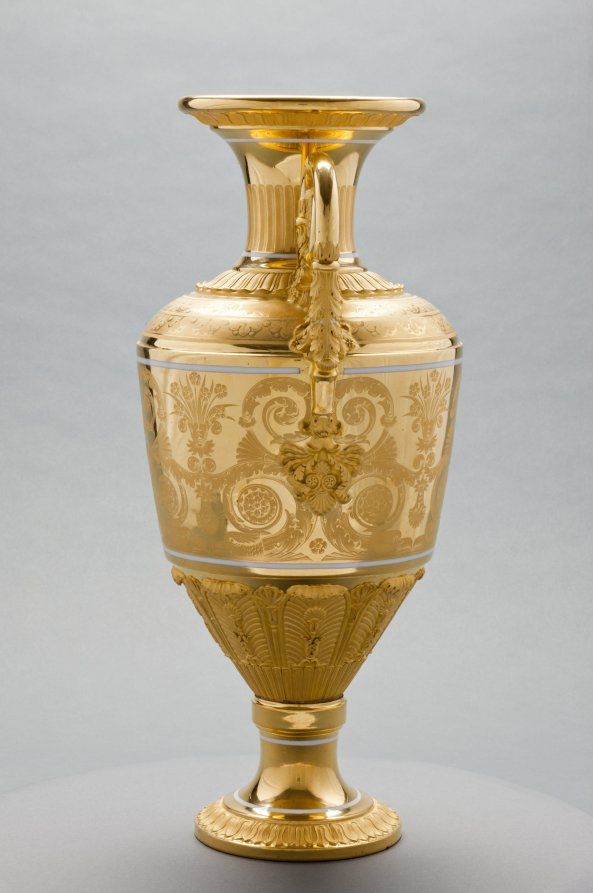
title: Vase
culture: Russia, St. Petersburg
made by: St. Petersburg Imperial Porcelain Factory (Russian)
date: c. 1820–1830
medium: gilt porcelain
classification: Ceramic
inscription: inscribed: "Moreau" in gold near lip.